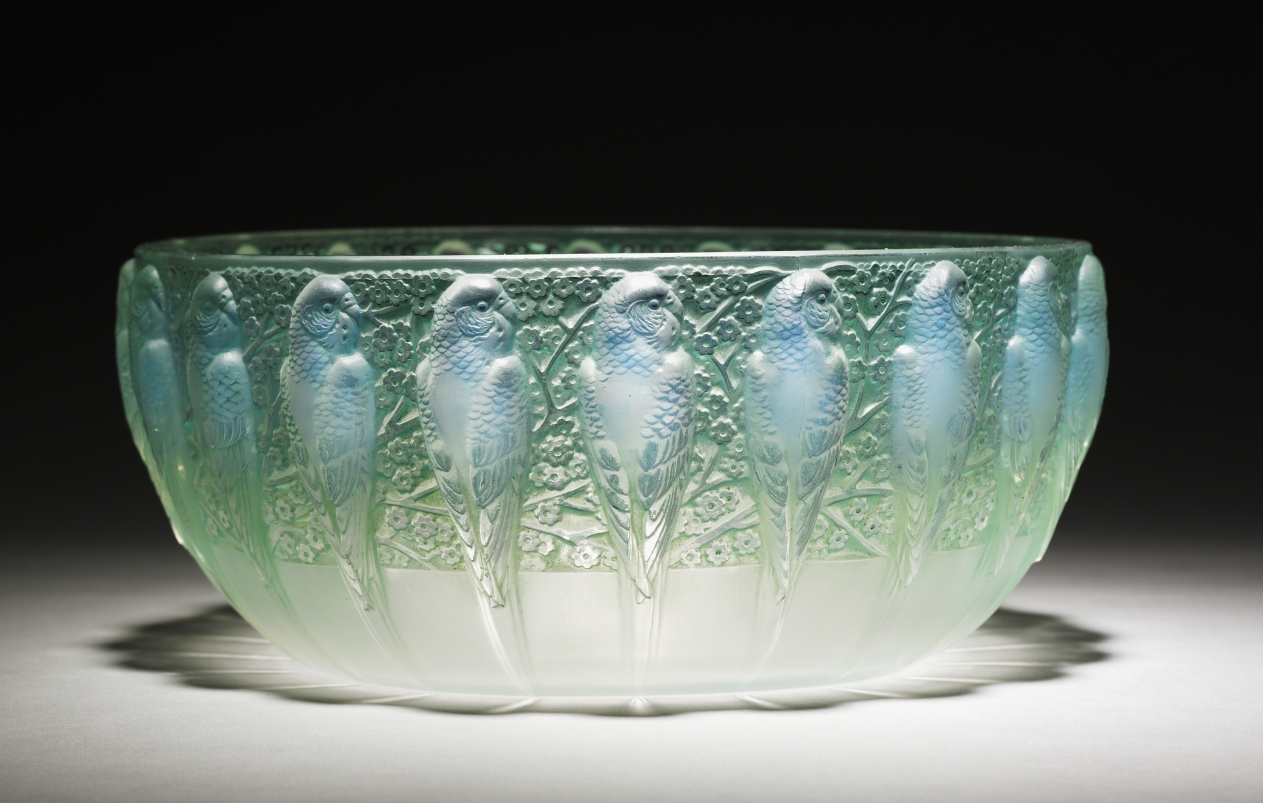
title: Parakeets (Perruches) Bowl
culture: France, 20th century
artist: René Lalique (French, 1860–1945)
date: 1931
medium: glass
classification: Glass